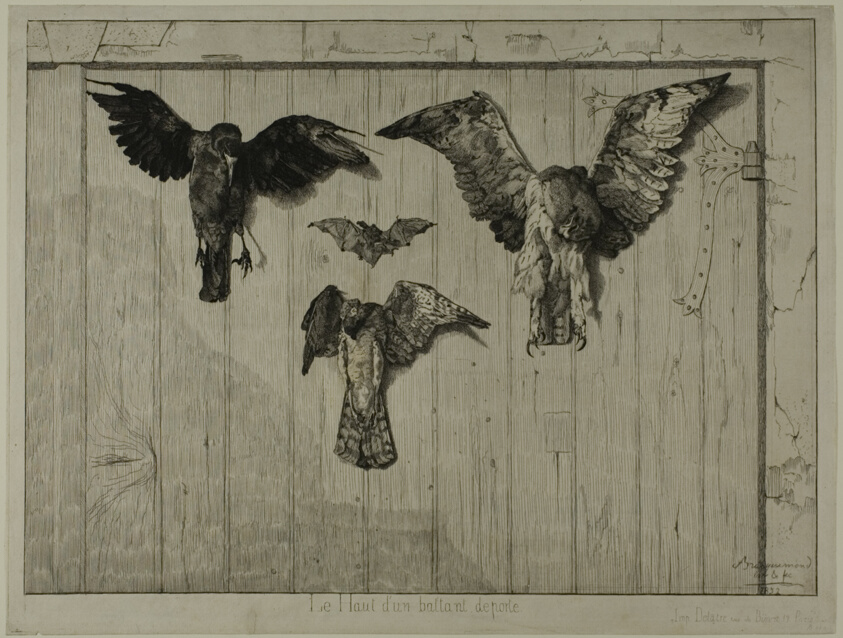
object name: Print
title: The Upper Part of a Door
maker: Felix Bracquemond; French, 1833–1914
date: 1852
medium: Etching on ivory laid paper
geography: France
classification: etching; print; prints and drawing